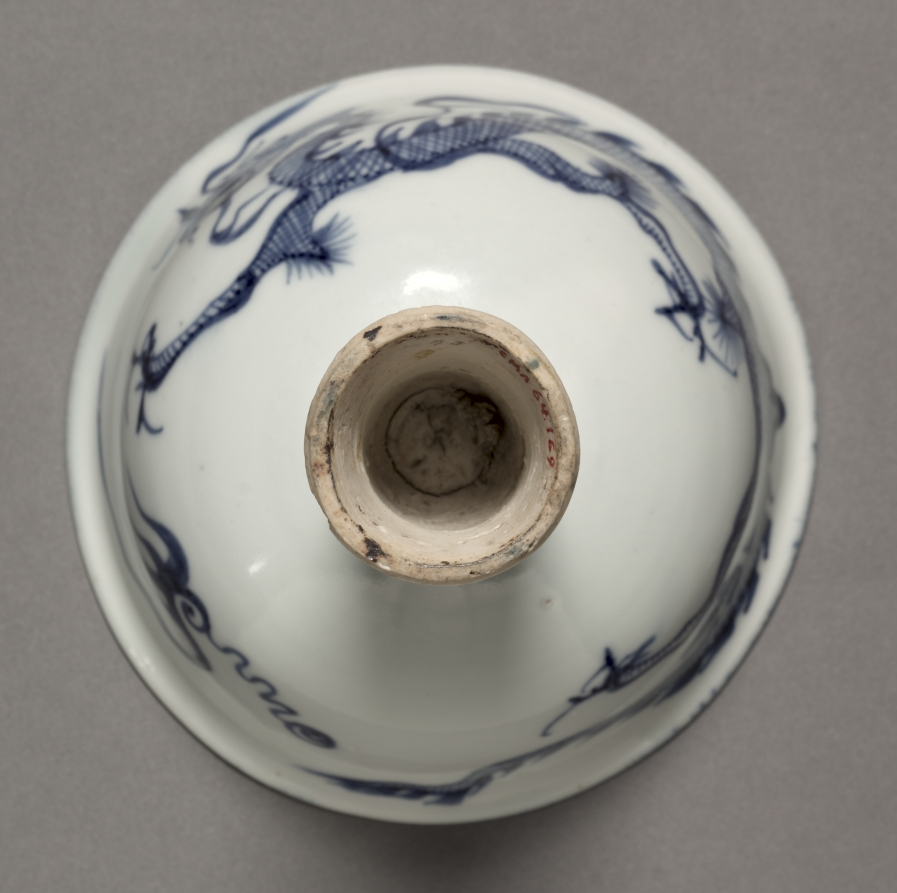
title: Stem Cup with Dragon Pursuing Flaming Jewel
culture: China, Jiangxi Province, Jingdezhen kilns, Yuan dynasty (1271–1368)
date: 1300s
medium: porcelain with underglaze cobalt blue and molded decoration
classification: Ceramic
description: The stem cup as a porcelain vessel shape was introduced to China by the Mongols from Northeast Asia when they ruled the country in the 14th century.